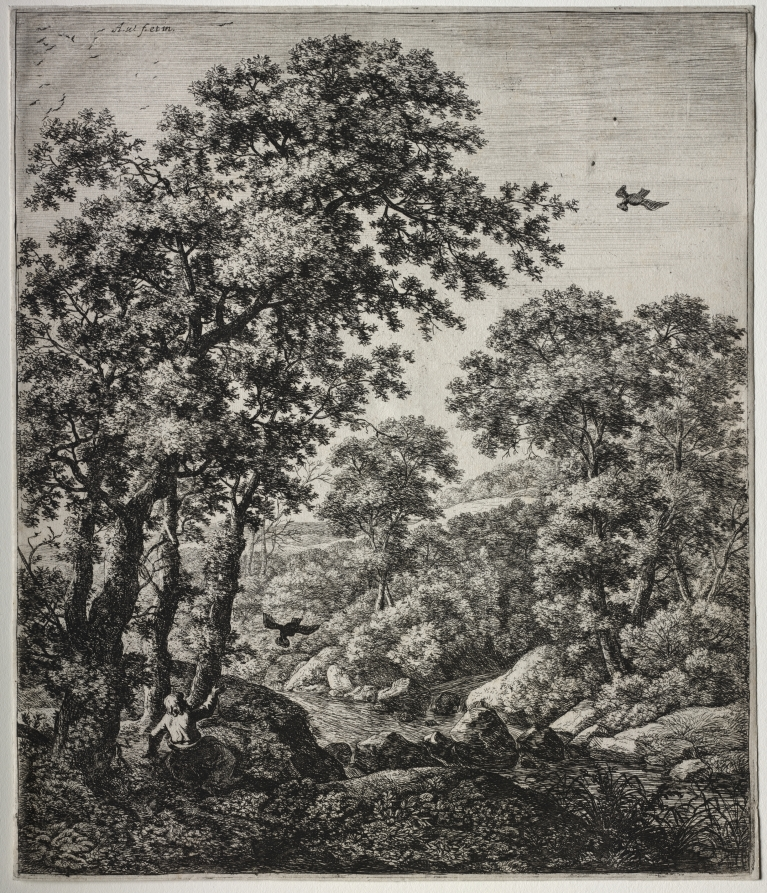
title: Six large upright landscapes with scenes from the Old Testament: Elijah Fed by the Ravens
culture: Netherlands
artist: Anthonie Waterloo (Dutch, 1609/10–1690)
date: 1640–90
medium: etching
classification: Print